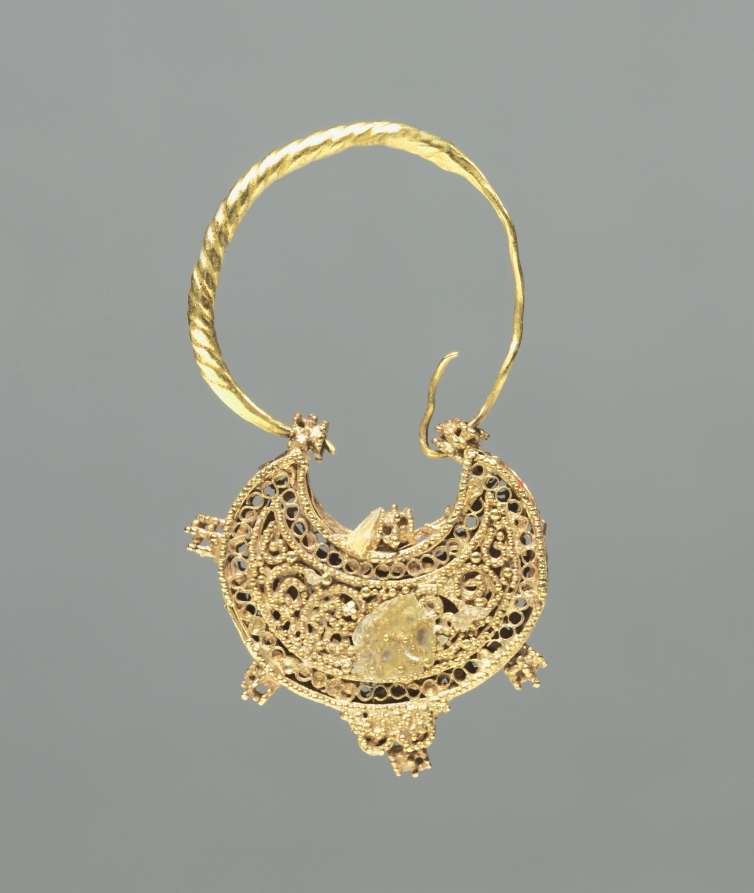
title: Crescent-Shaped Earring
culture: Byzantium, Constantinople?, Byzantine period, 11th century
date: 1000–1100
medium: gold filigree with cloisonné enamel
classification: Jewelry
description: The Byzantine lady who wore this earring may also have woven similar ornaments into her hair. Those who could afford it adorned not only their body but also their clothing with glittering jewels and shimmering gold.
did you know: Small gold cells were created to hold enamel paste of different colors; when fired, they harden and appear jewel-like.